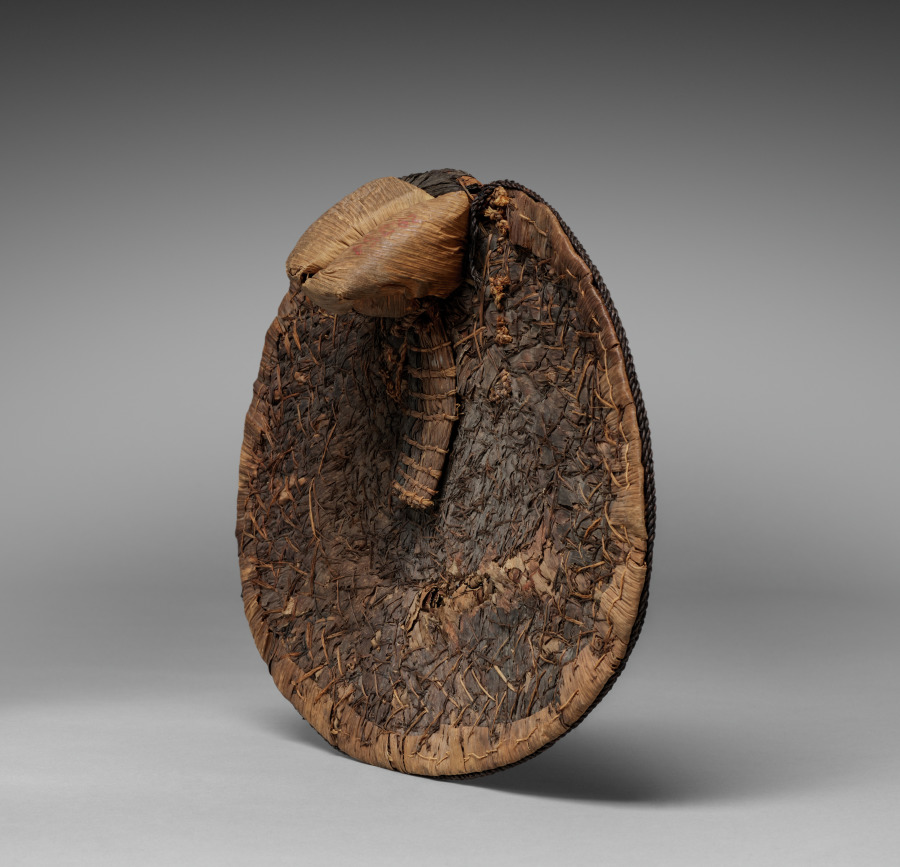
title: Back Skirt/Sitting Pad (negbe)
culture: Africa, Central Africa, Democratic Republic of Congo, Mangbetu-style makers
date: by 1928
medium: Plant fibers and dye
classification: Garment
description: Egbe (singular: negbe) were fashionable and practical garments aristocratic Mangbetu women made for special occasions. Worn over a skirt, it tied onto a girdle along with a frontal “apron.” The curved interior piece rested on the lower back. Thickly woven, flexible natural fibers bent with the body, cushioning the wearer’s behind when sitting. When the woman was standing, the decorated flat portion faced outward, showing off bold geometric motifs. Egbe were among items sold to foreigners at the Mangbetu king’s encouragement as the Mangbetu actively constructed their self image for outsiders during the 1920s and 1930s.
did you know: A contemporary fashion in 1929, when it was purchased or collected, this egbe is now a historical document of past styles.